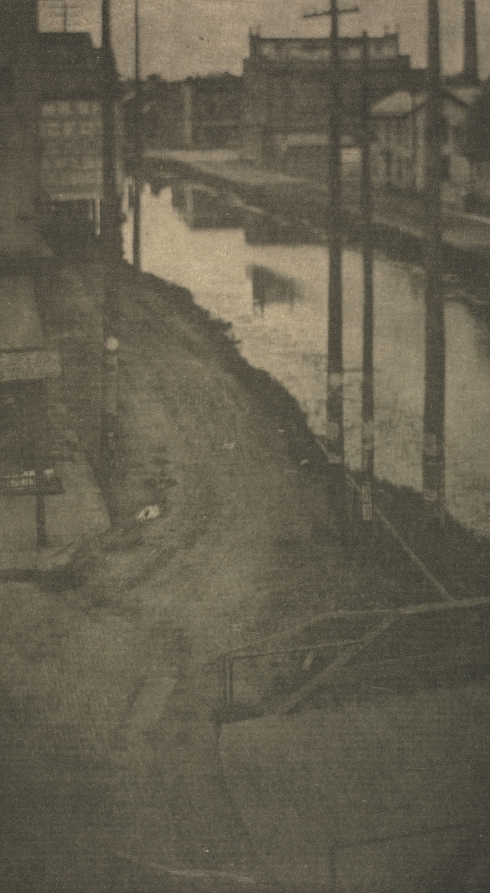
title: Camera Work: Telegraph Poles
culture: America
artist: Clarence H. White (American, 1871–1925)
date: 1903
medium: photogravure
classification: Bound Volume